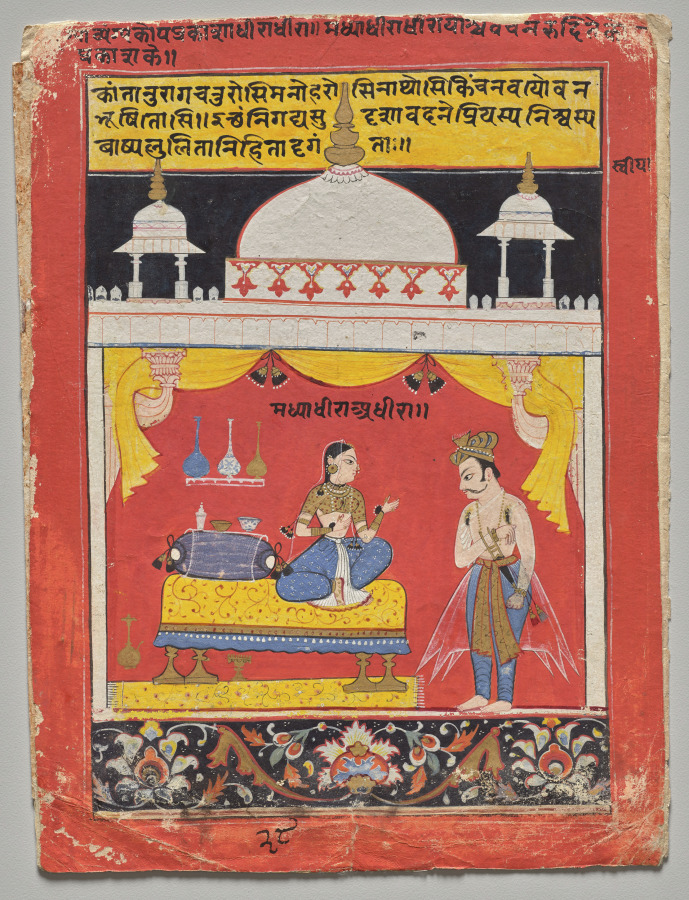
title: A Young, Angry Heroine, Folio 28 from a Rasamanjari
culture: Northwestern India, Rajasthan, Rajput Kingdom of Mewar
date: c. 1615–20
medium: Gum tempera, ink, and gold on paper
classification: Painting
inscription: Recto, upper center: You are expert in flirtation; you are charming; you are my lord and wonderful in your youthful handsomeness.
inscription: Recto, center: Madya Dhira Adhira.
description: The scene of a conversation between two lovers is set within a bedchamber, golden curtains pulled up. The heroine sits on the bed, with three long-necked wine vessels on the wall behind her. A brass ewer for washing with water is on the floor behind the bed.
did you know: Men applied fragrant black pastes to their underarms.